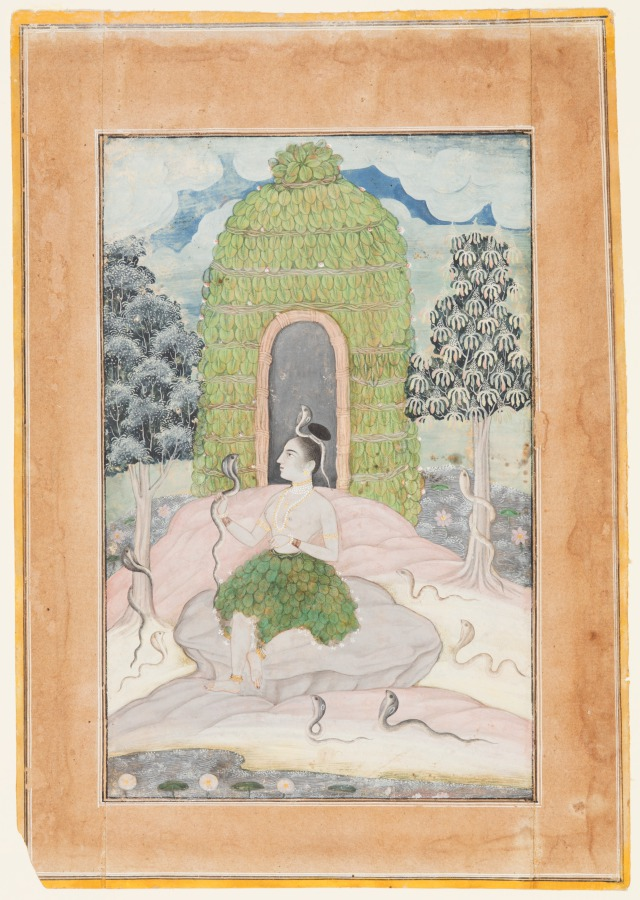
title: Ascetic Princess with Snakes in a Wilderness: Asavari Ragini, from a Ragamala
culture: Northwestern India, Rajasthan, Rajput Kingdom of Bikaner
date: c. 1650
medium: gum tempera and gold on paper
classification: Painting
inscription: asāvarī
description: According to a theme explored in various examples of Indian poetry and literature, a princess has fled her royal life to live alone on an island in the forest. She has skillfully made a skirt and hut of leaves and vines. Suffering deprivation and practicing yogic disciplines, she has achieved the power to peacefully commune with the water snakes, who are mystically drawn to her.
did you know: This painting once belonged to the filmmaker James Ivory (American, b. 1928).